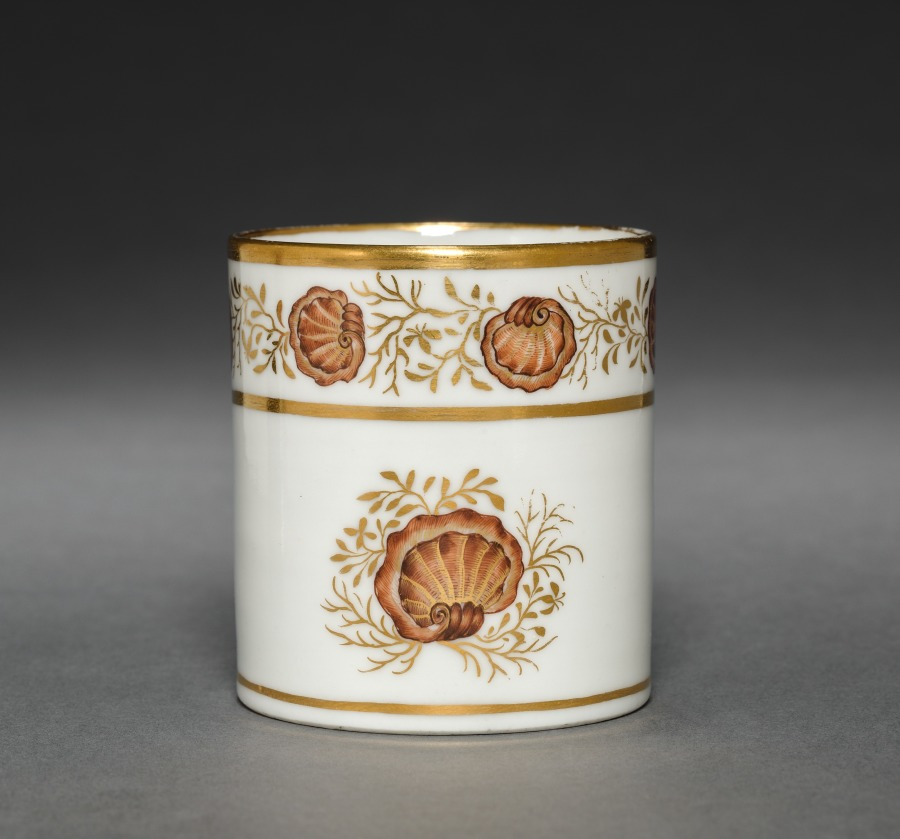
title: Cup from Oliver Wolcott, Jr. Tea Service (3 of 6)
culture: Chinese Export porcelain, late 18th-early 19th century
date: 1785–1805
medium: porcelain, sepia enamel, gold leaf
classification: Ceramic